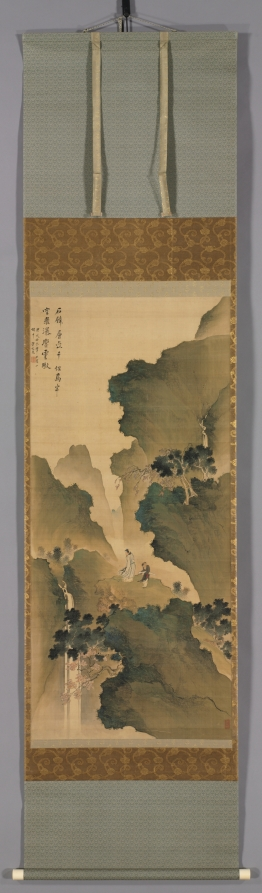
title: Gazing at a Waterfall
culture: Japan, Edo period (1615–1868)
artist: Tani Bunchō (Japanese, 1763–1841)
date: 1790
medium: hanging scroll; ink and color on silk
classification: Painting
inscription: The stone cliff of layered rocks is extremely high. Waterfalls tumbling from the skies reverberate in the clouds.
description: Artist Tani Bunchō painted this image in a mountain pavilion during winter. He inscribed it with two lines of a poem: “The stone cliff of layered rocks is extremely high. Waterfalls tumbling from the skies reverberate in the clouds.” The scholarly figure and attendant carrying his qin (a stringed instrument) are set amid majestically soaring mountains in China. For many people in Japan at the time, the image would call to mind a poem about a waterfall at Mount Lu by Chinese poet Li Bai (701–762).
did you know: Drive about eight hours west of Shanghai to get to Mount Lu, the mountain range likely alluded to in this painting.